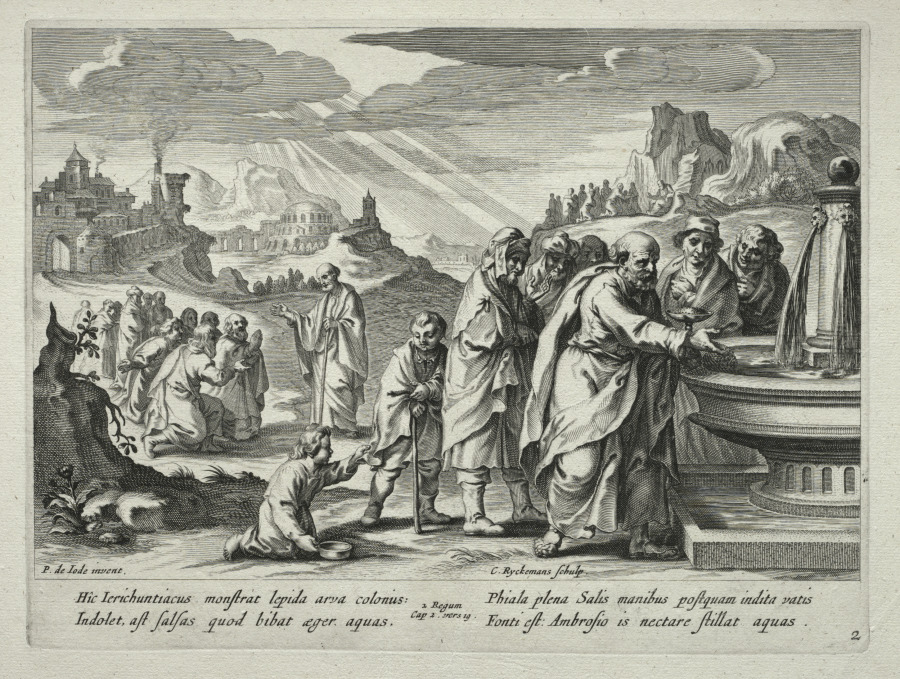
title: The Story of Elisha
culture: Flanders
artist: Nicolaes Rijckmans (Flemish, 1616-)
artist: after Pieter I de Jode (Flemish, 1570–1634)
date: 1643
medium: engraving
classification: Print